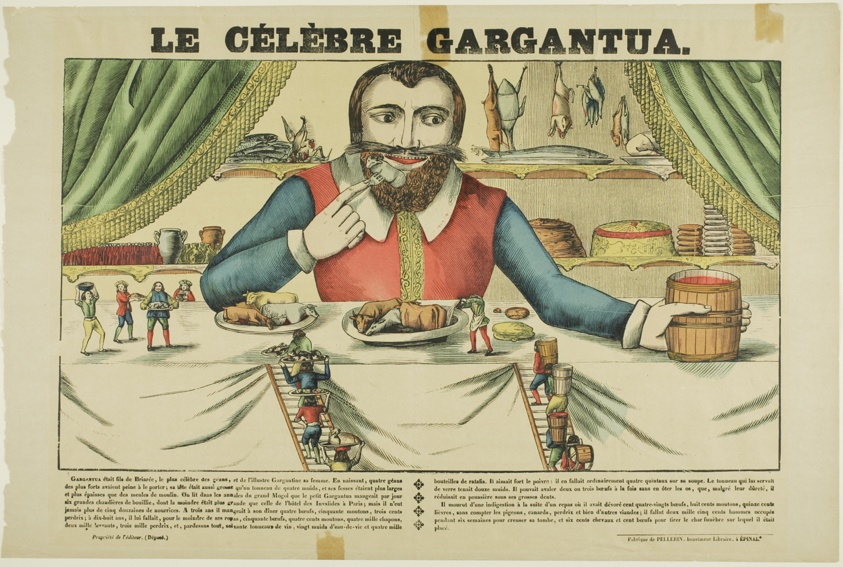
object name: Print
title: The Famous Gargantua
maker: Unknown artist; Printed by Jean-Charles Pellerin (French, 1756-1836)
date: late 18th or early 19th century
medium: Woodcut with hand-coloring on tan wove paper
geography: France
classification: woodcut; print; prints and drawing